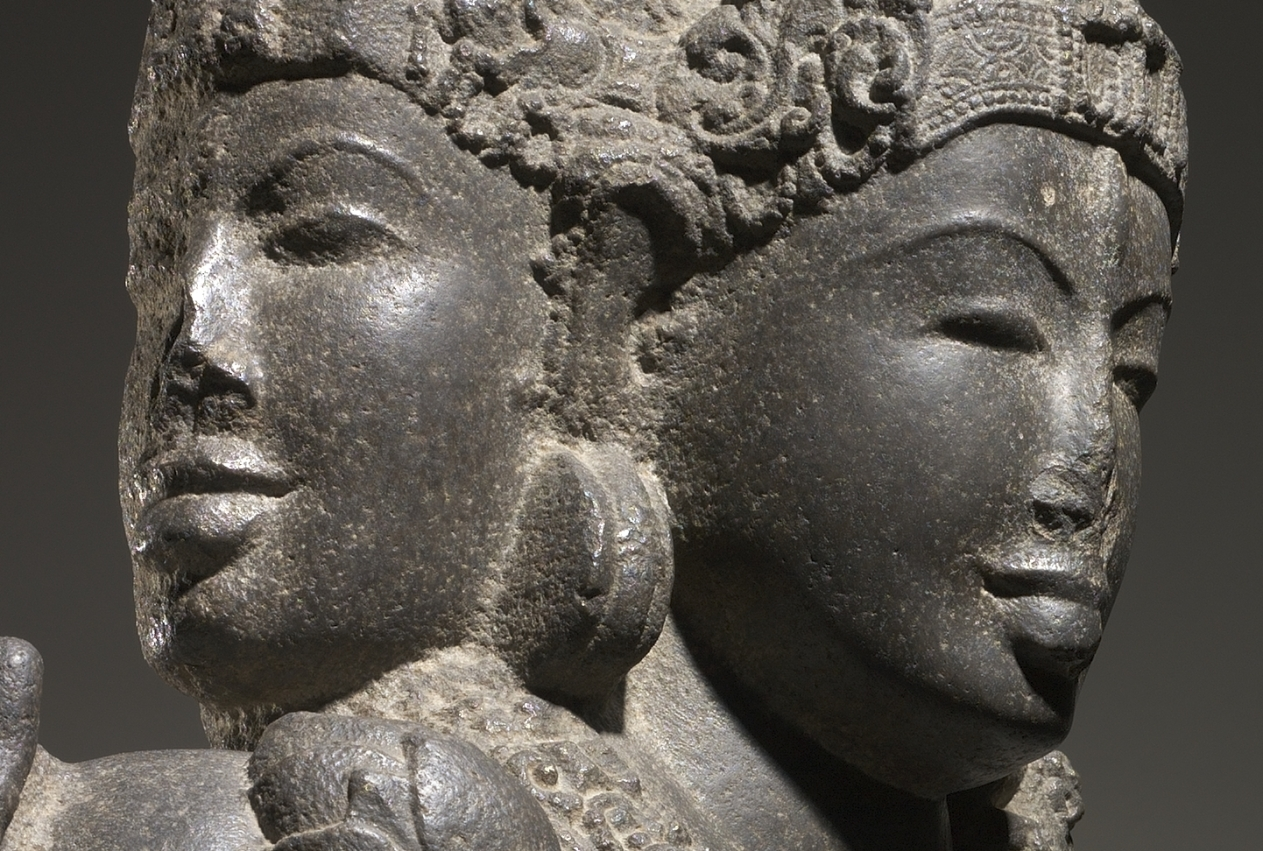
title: Brahma-Shiva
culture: South India, Tamil Nadu, Chola dynasty, late 10th - early 11th century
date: late 900s–1000s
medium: granite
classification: Sculpture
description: In the Hindu pantheon Brahma is in charge of carrying out the work of creation. In this tour-de-force of South Indian temple sculpture, he is in a special regal aspect, with the only elements of his typical priestly appearance being the prayer beads and the matted dreadlocks piled on his head. Four arms connote superhuman power, and four heads convey the idea that his creative activities spread in all four directions. His upper right hand enjoins freedom from fear, and the lower holds a lotus bud associated with birth and the process of creation. His lowered left hand is held in the gift-giving gesture, suggestive of the gift of creation he will bestow upon the world.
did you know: The back of the sculpture retains the original textured surface from a pointed chisel, suggesting it was in a niche or near a wall, protected from worshippers’ touches.